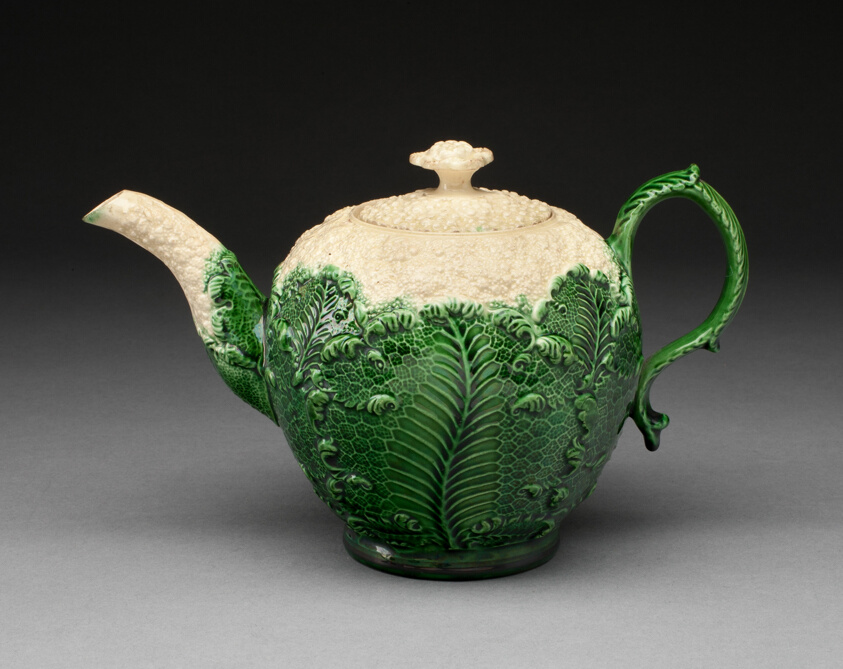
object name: Ceramics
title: Teapot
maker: Staffordshire, England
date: 1765/80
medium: Lead-glazed earthenware (creamware)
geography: Staffordshire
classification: teapot; creamware; ceramics; lead-glazed earthenware; european decorative arts; earthenware